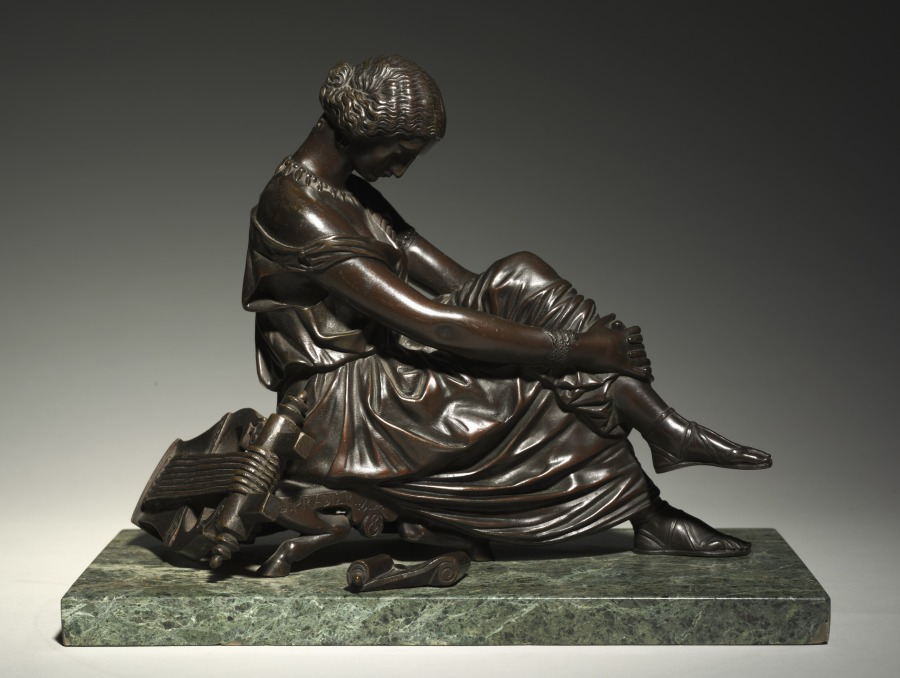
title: Sappho: Portrait of a Woman (Louise Colet)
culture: Switzerland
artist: James Pradier (Swiss, 1790–1852)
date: c. 1830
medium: bronze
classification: Sculpture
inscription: On the front of the stool there is an inscription handwritten into the sculpture prior to casting: "J. PRADIER / Susse," followed by an indistinct mark resembling an ampersand